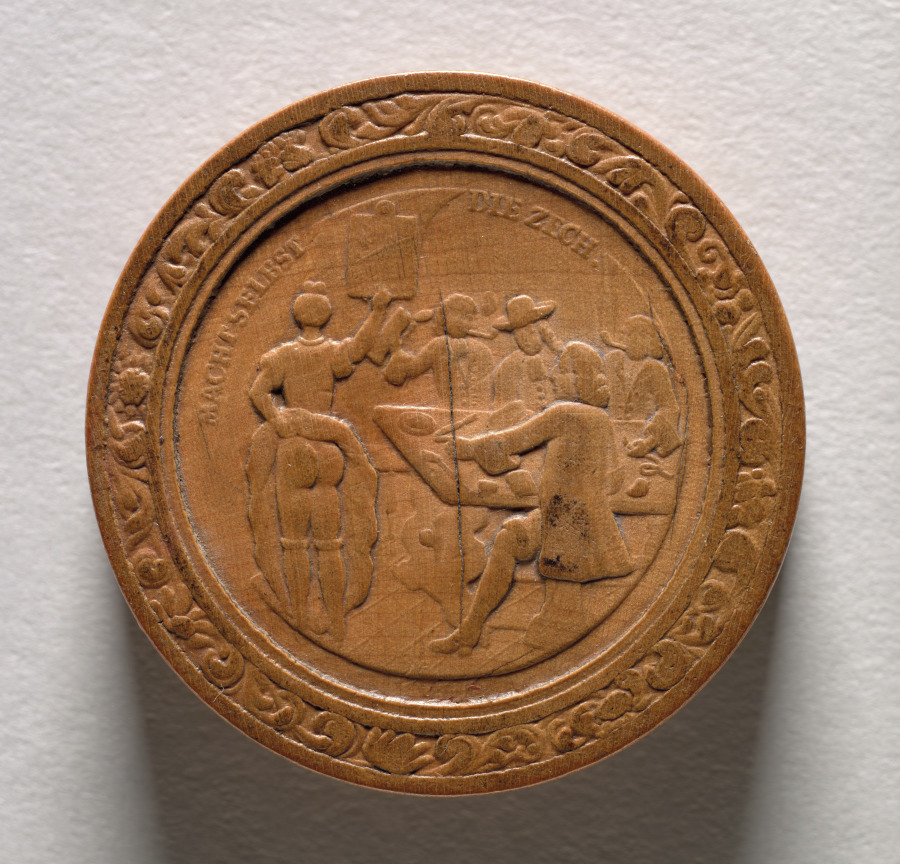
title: Gaming Piece (reverse)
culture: Germany, late 17th-early 18th Century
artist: Martin Brunner (German, 1659–1725)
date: c.1700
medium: wood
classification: Furniture and woodwork